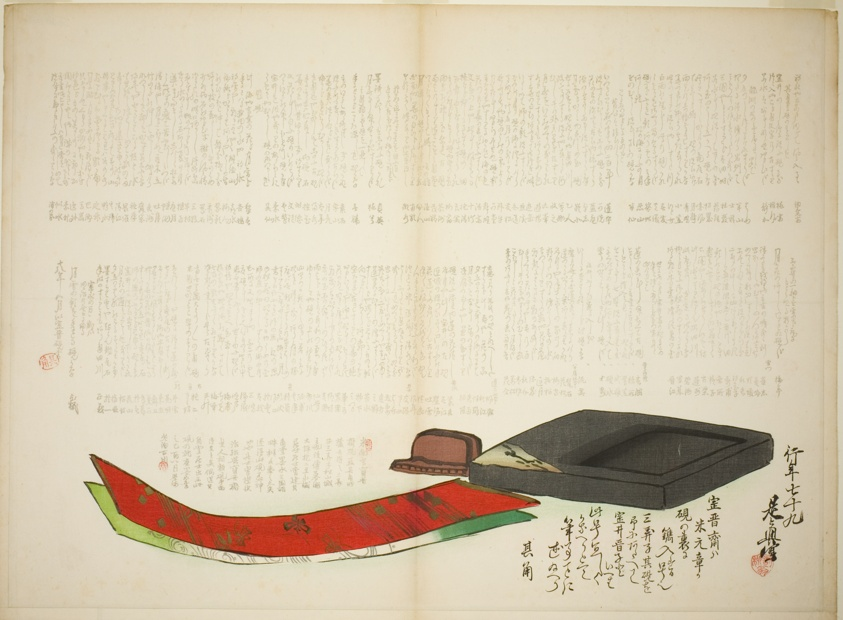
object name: Print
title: Layers of Kikaku Poetry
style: Japanese (culture or style)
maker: Shibata Zeshin (Japanese, 1807-1891)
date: 8th month, 1885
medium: Color woodblock print; surimono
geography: Japan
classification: woodblock print; print; asian art